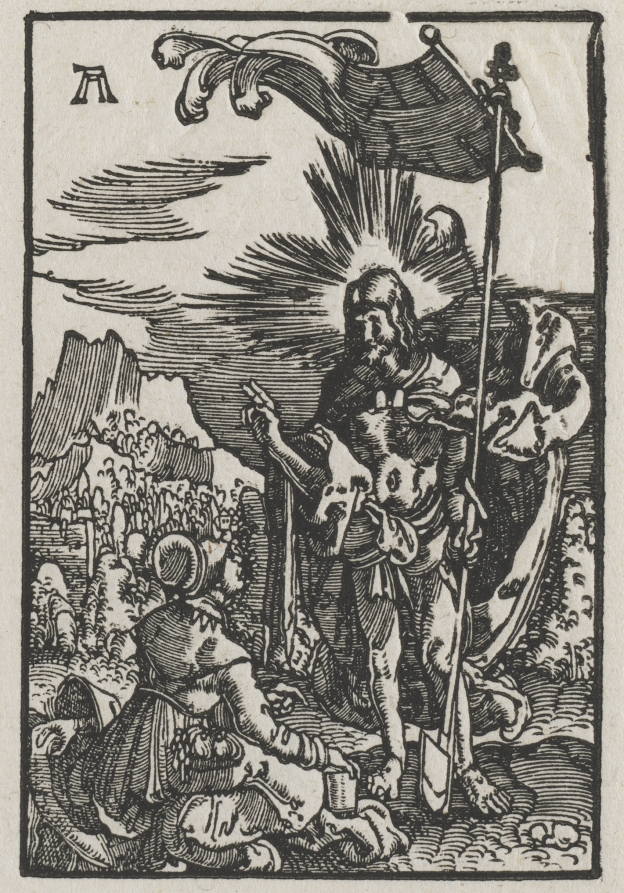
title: The Fall and Redemption of Man: Christ Appearing to St. Mary Magdalen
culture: Germany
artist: Albrecht Altdorfer (German, c. 1480–1538)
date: 1515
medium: woodcut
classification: Print